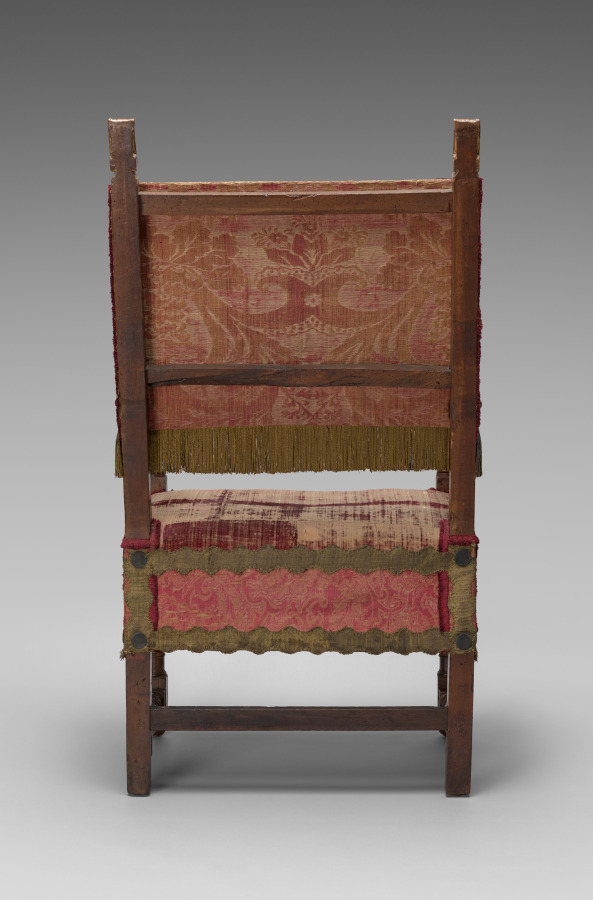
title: Armchair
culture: Italy, 17th century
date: 1600s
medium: walnut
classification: Furniture and woodwork